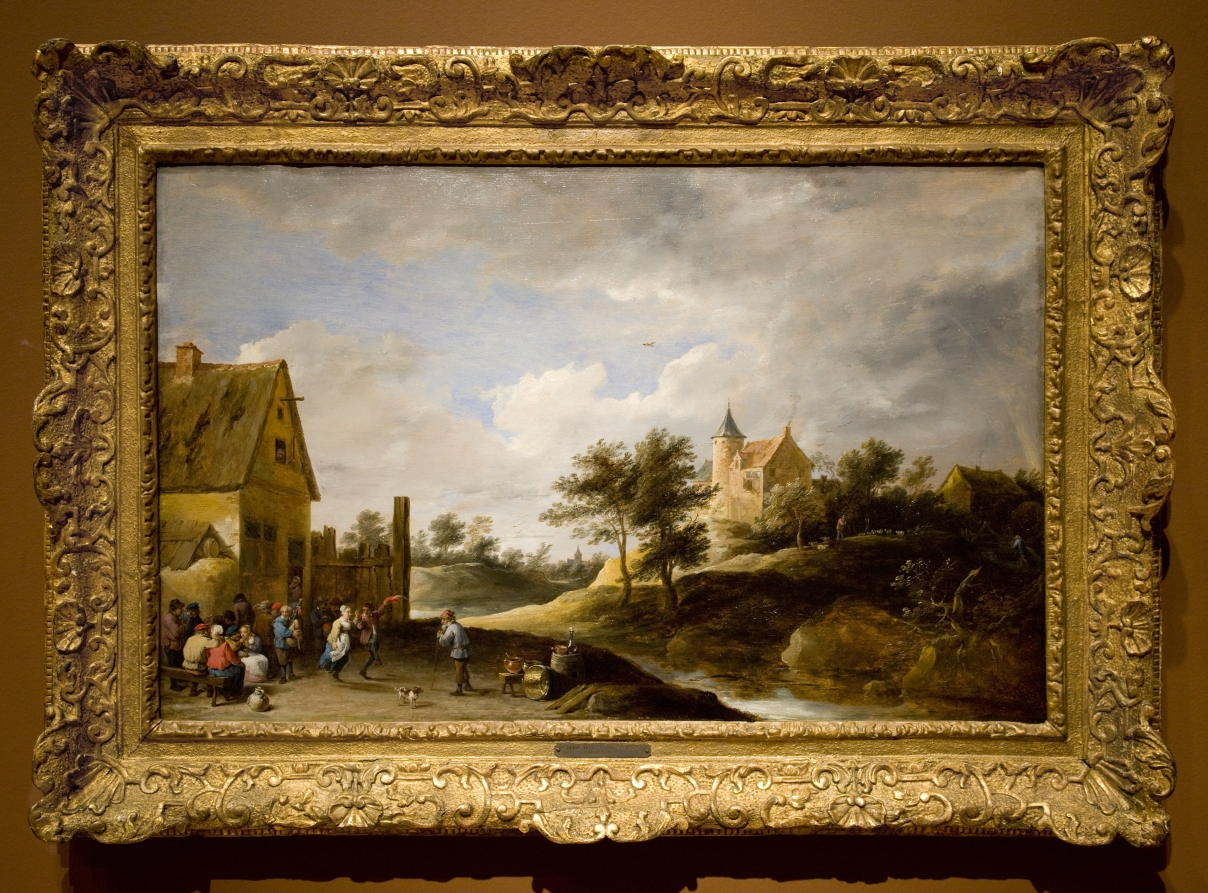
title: Landscape with Peasants Dancing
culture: Flanders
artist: David Teniers (Flemish, 1610–1690)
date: c. 1645–50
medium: oil on wood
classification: Painting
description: Before a rustic inn, a group of villagers converse, embrace, and dance to a bagpiper’s tune. Teniers was one of many Netherlandish artists whose paintings celebrate the joys of country life. These delicately painted works were created primarily for an elite urban audience nostalgic for a simpler existence.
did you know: This painting combines two of David Teniers's specialties: landscape and scenes of country life.